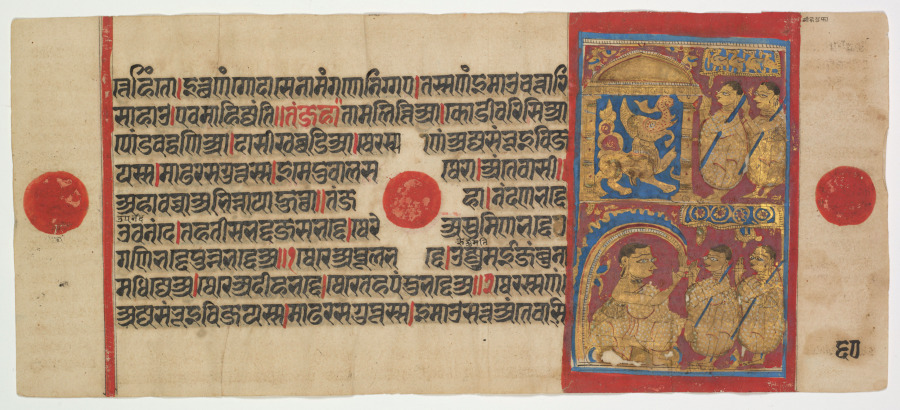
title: The Lion's Cave with Sthulabhadra and His Sisters, Folio 60 (verso), from a Kalpa-sutra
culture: Western India, Gujarat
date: c. 1450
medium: Gum tempera, ink, and gold on paper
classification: Painting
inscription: [[beginning with line 1]] ttehiṁto | ittha ṇaṁ godāse nāmaṁ gaṇe niggae | tassa ṇaṁ imāu cattāri [line 2] sāhāu | evam=āhijjaṁti || taṁ jahā Tāmalittiā | Koḍīvarisiā [line 3] Poṁḍavaddhaṇiā | Dāsīkhabbaḍiā | therassa| |ṇaṁ ajja-Saṁbhūivija- [line 4] yassa | māḍhara-saguttassa | ime ḍuvālasa therā | aṁtevāsī || [line 5] ahāvaccā abhinnāyā hutthā || taṁ jahā | Naṁdaṇabhadde [line 6] Uvanaṁde [note 1] | taha Tīsabhadda Jasabhadde | there a Sumiṇabhadde 7? [line 7] Gaṇibhadde Punnabhadde a || 1 there a Thūlabhadde | Ujjumaī [note 2] Jaṁbu nā- [line 8] madhijje a | there a Dīhabhadde | there taha Paṁḍubhadde a || 2 therassa ṇaṁ | [line 9] ajja-Saṁbhūivijayassa | māḍhara-saguttassa | imāu satta aṁtevāsi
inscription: [[upper right]] sīha guphā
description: This manuscript is open to a page with a painting that depicts the story of a Jain monk who transformed himself into a composite beast when his sisters, two nuns, came to visit him. Terrified, the nuns ran to a senior monk, at the lower left, who admonished their brother for his overly prideful display of power. Remarkably, this story is not told in the text itself, which contains only their names among a list of prominent Jain teachers. The painting would remind a reader of the story that is found in many commentaries to the text.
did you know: The three red dots in the margins and the center occur only on the reverse side of the page; the obverse side has only one red dot in the center.